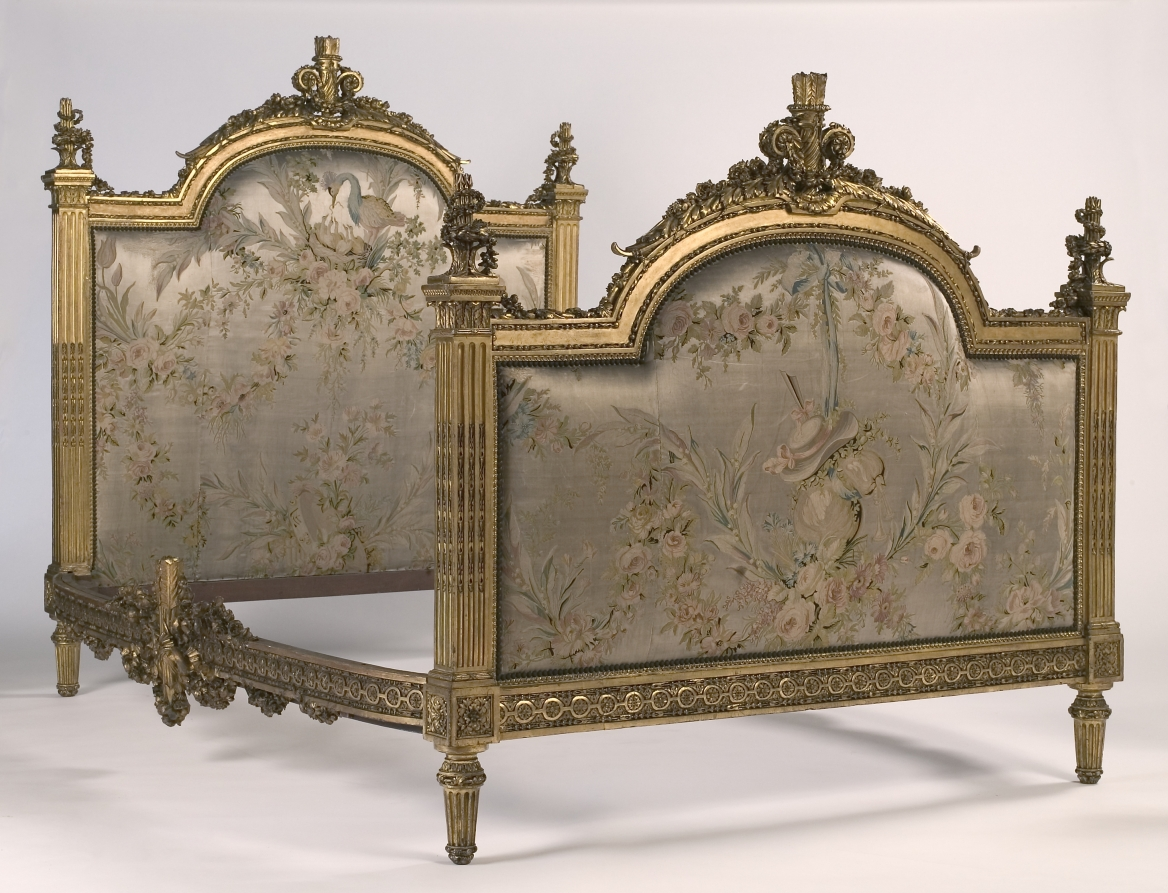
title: Bed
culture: France, 18th century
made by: attributed to Georges Jacob (French, 1739–1814)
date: 1700s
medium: gilded wood and embroidered satin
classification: Furniture and woodwork